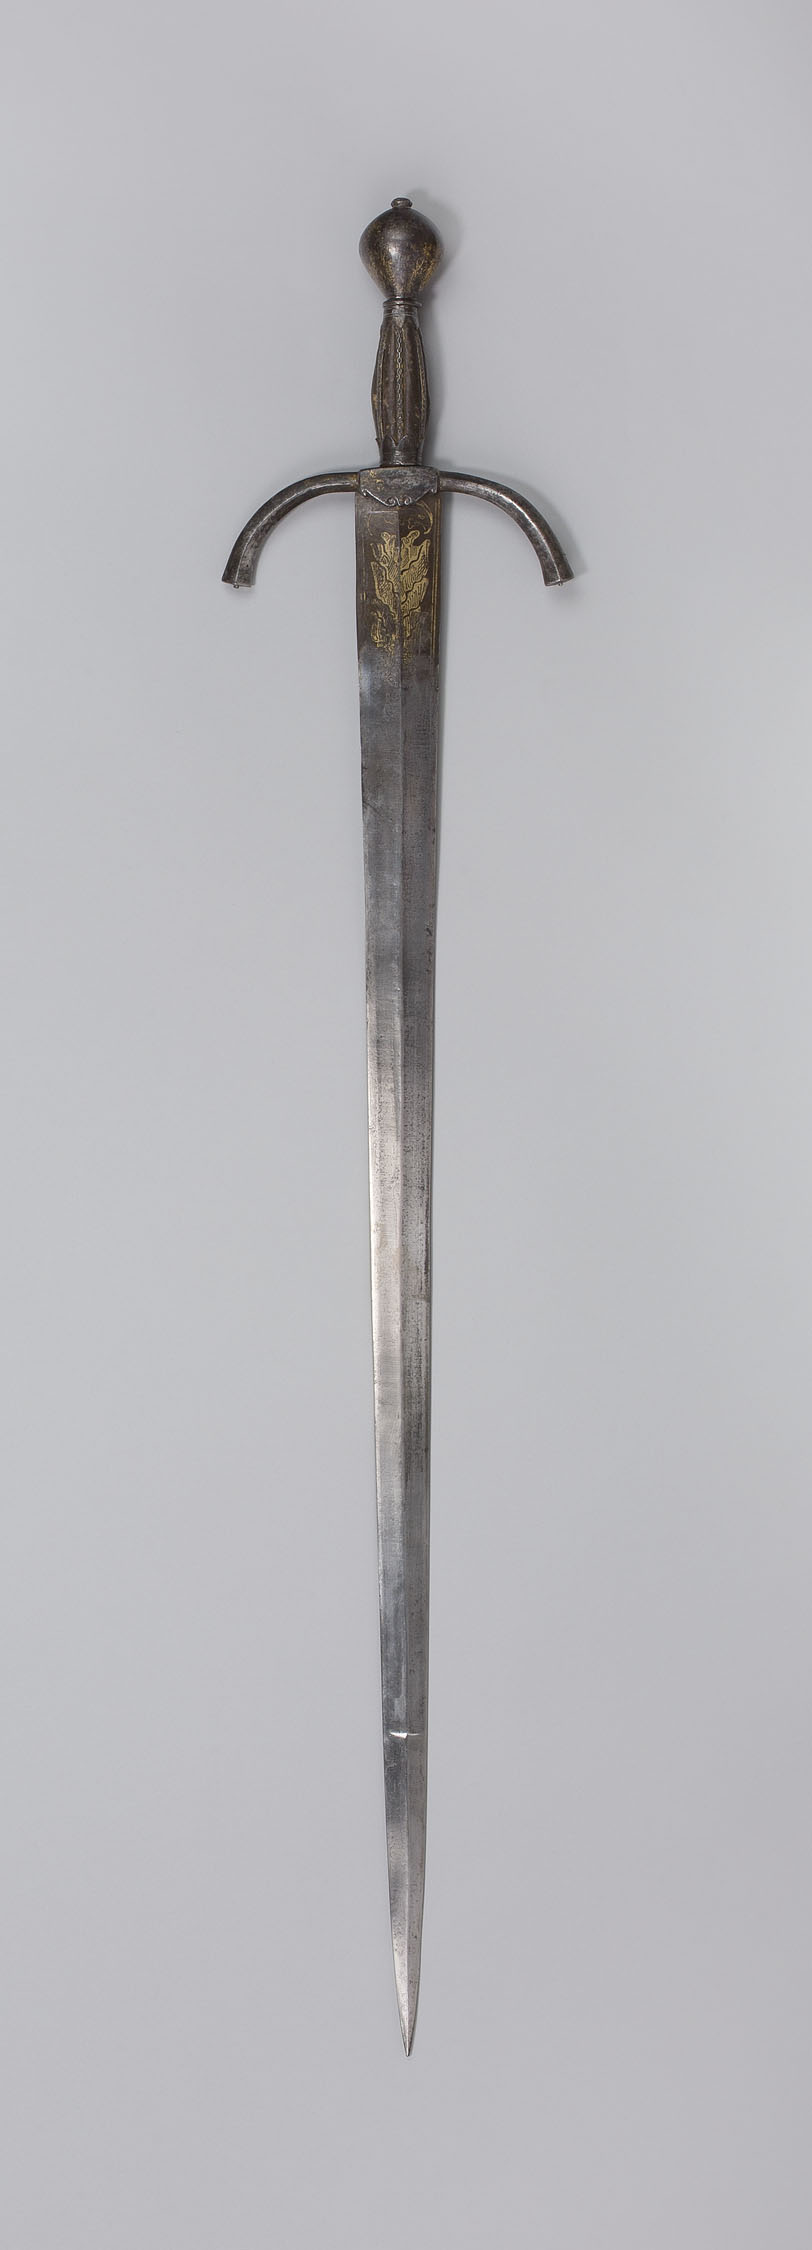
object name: Arms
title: Arming Sword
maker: Probably Italian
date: 1520/30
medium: Steel, iron, gilding, wood, and silk textile (velvet)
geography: Italy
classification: edged weapon-sword; arms; arms and armor